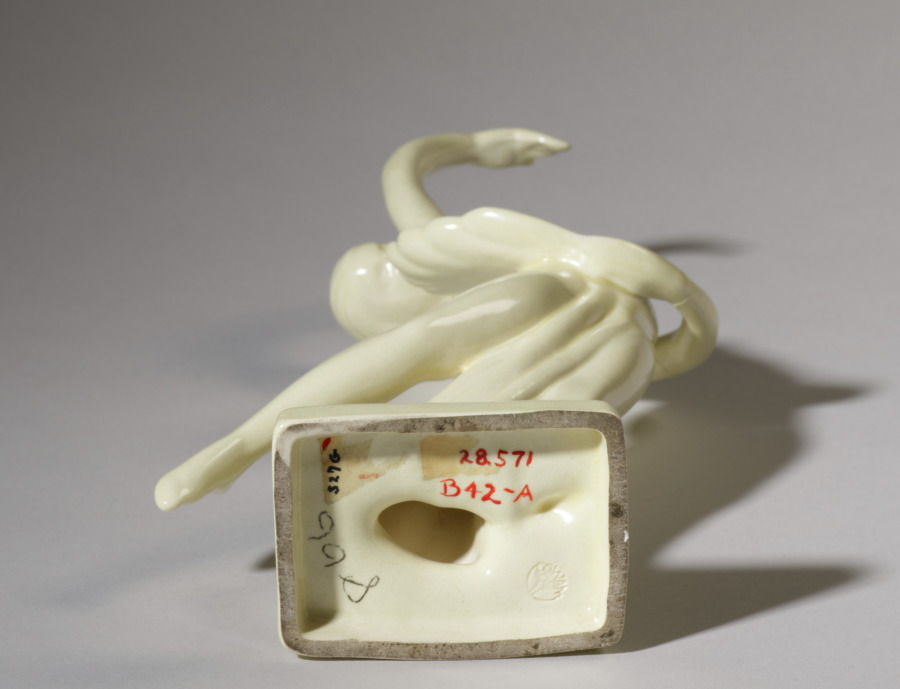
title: Fan Dancer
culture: America, Ohio, Cleveland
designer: Waylande Gregory (American, 1905–1971)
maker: Cowan Pottery Studio (America, Rocky River, Ohio, 1920–1931)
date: 1928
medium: glazed ceramic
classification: Ceramic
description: A stamp on the bottom of this ceramic sculpture indicates that it was produced at the Cowan Pottery studios. Although unsigned, it was most likely designed by Waylande Gregory, one of the studio’s premiere artists. In 1928 the studio’s founder, R. Guy Cowan, brought Gregory to Cleveland from Chicago, where he was developing a reputation as a talented young sculptor. Cowan Pottery, located in Lakewood (1912–17) and later Rocky River (1919–32), Ohio, began producing ceramic sculpture in the mid-1920s, launching its most fertile creative period. Cowan employed a large team of talented artists at the studio, including Walter Sinz, Thelma Frazier Winter, and Viktor Schreckengost. The studio brought national fame to Cleveland ceramists, but was forced to close due to economic circumstances in 1932.